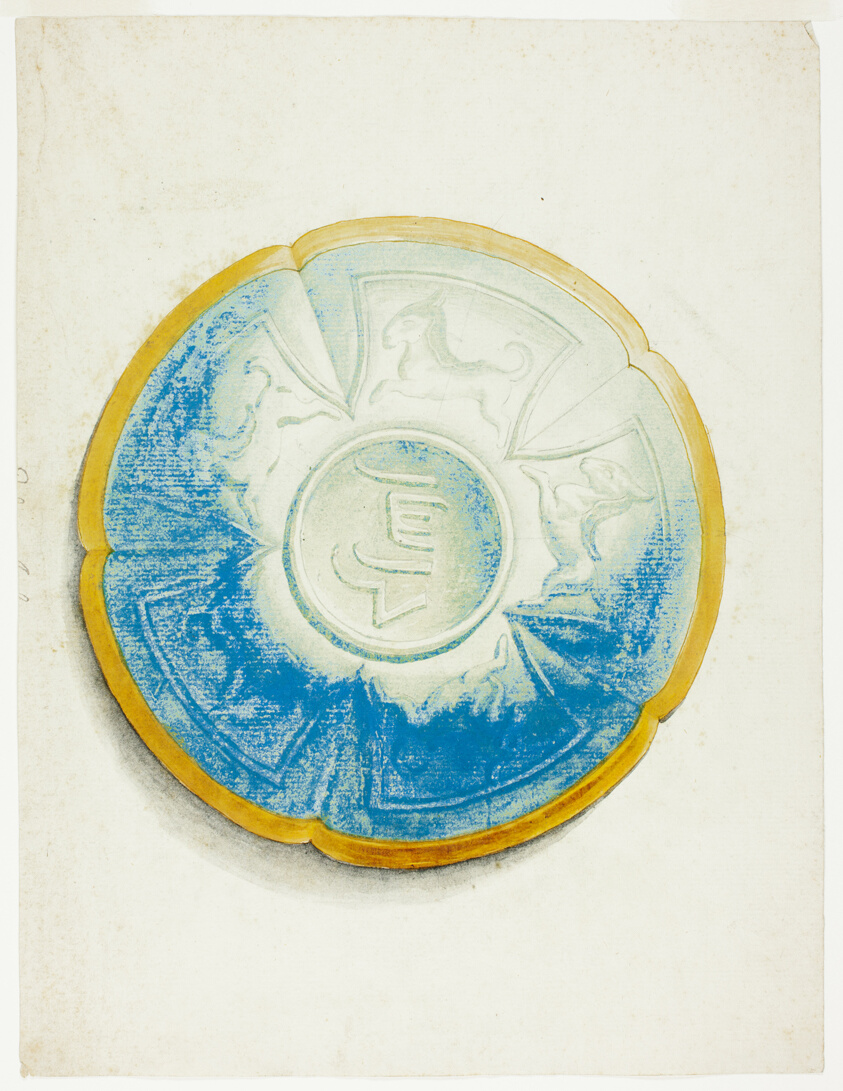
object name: Drawing and Watercolor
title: Islamic Plate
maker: Giuseppe Grisoni (Italian, born Flanders, 1699-1769)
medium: Gouache over black chalk, on ivory laid paper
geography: Flanders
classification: gouache; watercolor; drawings (visual works); prints and drawing